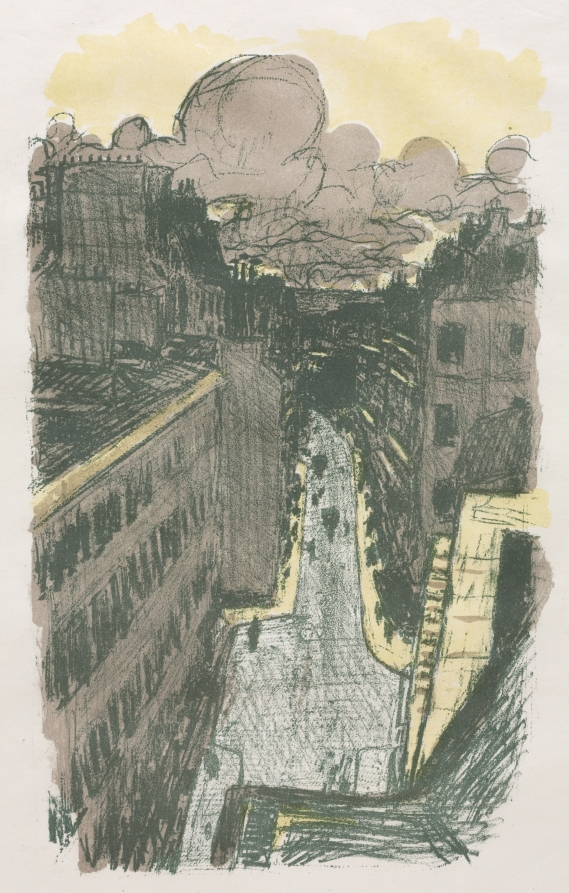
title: Street Scene from Above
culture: France, 19th century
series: Some Scenes of Parisian Life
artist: Pierre Bonnard (French, 1867–1947)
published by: Published by Ambroise Vollard; Printed by Auguste Clot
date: 1899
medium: lithograph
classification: Print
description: This suite of color lithographs collected Pierre Bonnard’s observations of city life, ranging from animated street scenes to distant observations glimpsed from the artist’s Montmartre studio window. Rather than memorializing the famous monuments of Paris, Bonnard preferred to depict small neighborhood scenes populated by urbanites shopping and strolling and by vendors selling their wares. The setting for one of the prints is the second-largest public park in Paris, the Bois de Boulogne, which was a popular place for families to relax, stroll, and enjoy carriage rides around the lakes. Two prints are nocturnal scenes in which gaslight emanating from shop windows is reflected on the wet streets, creating passages of bright yellow in the otherwise dark compositions. Bonnard’s favorite subjects, such as the Parisienne—a young, fashionable, modern woman—as well as children and dogs, appear repeatedly throughout the prints in the suite.